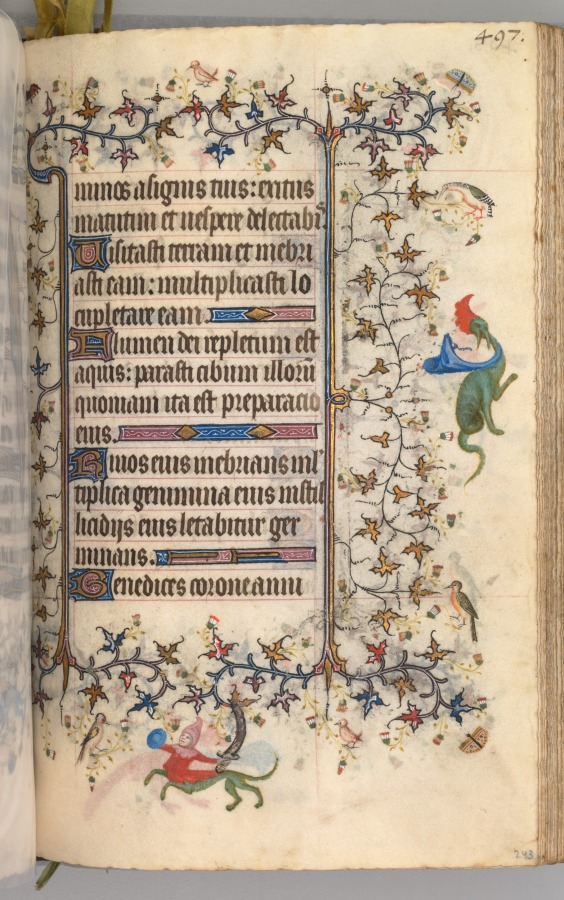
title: Hours of Charles the Noble, King of Navarre (1361-1425): fol. 243r, Text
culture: France, Paris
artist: Master of the Brussels Initials and Associates (French)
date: c. 1405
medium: ink, tempera, and gold on vellum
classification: Bound Volume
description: This precious volume was obviously highly prized by its owner, the French-born King of Navarre, who had his coat of arms painted on no less than twenty folios. Rather than directly commissioning this manuscript from a specific workshop, it seems that Charles the Noble acquired his book of hours -- perhaps ready-made for the luxury market -- while on a trip to Paris in 1404-05. A collaborative effort, six painting styles are evidenced within the pages of this codex, those of two Italians, two Frenchmen, and two Netherlanders. The painter who was responsible for the planning and decoration of the book, and who produced seventeen of the large miniatures, was a Bolognese artist known as the Master of the Brussels Initials. His principal assistant, responsible for most of the borders, was a Florentine who signed his name "Zecho" da Firenze on folio 208 verso.